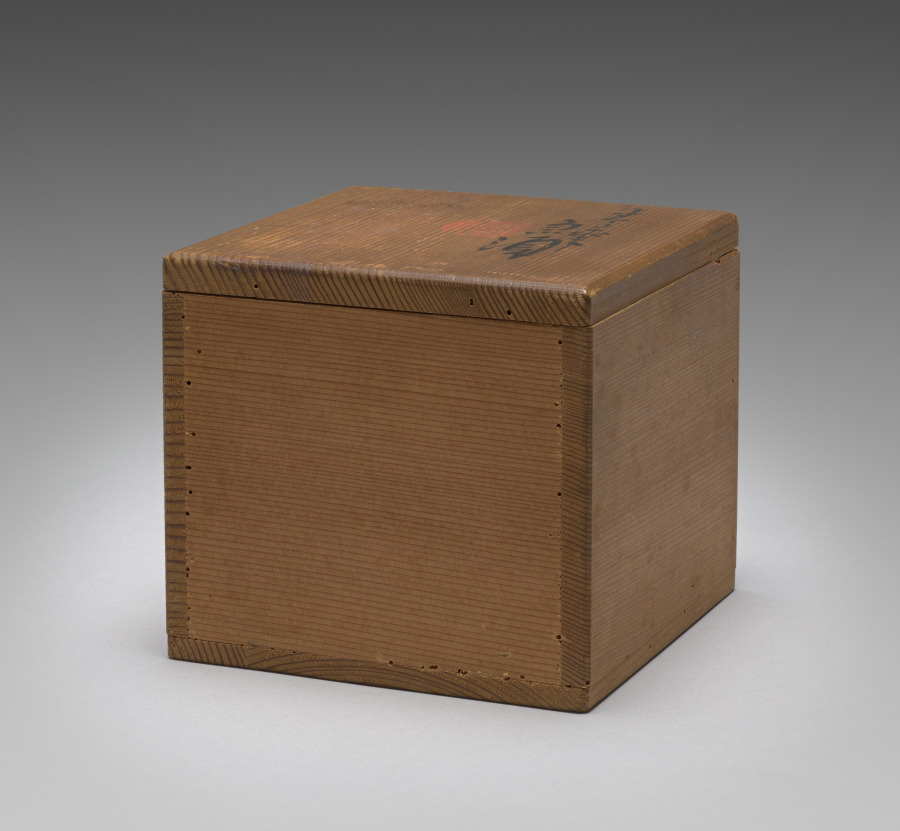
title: Tea Set with Orchids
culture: Japan, Meiji period (1868–1912)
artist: Seifū Yohei III (Japanese, 1851–1914)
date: c. 1893–1914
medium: Teapot with set of five teacups; porcelain with underglaze blue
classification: Ceramic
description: Although the teapot here is stored in a separate box from the five cups, these six pieces may once have been part of a tea set that included other tools such as a water cooler. The teacups have orchid flowers on both sides in underglaze blue, as well as a blue band inside the footring. The teapot has the same design and a blue band painted around the bottom of the lid’s knob. The cups’ long wood storage box is stamped on the exterior, over the lid and base, with a small red seal reading “Satō.” The same seal appears on five small squares of yellow textile, one placed in the bottom of each compartment in the teacup storage box. These are additional to the customary yellow cloths stamped with a “Seifu” seal. Interestingly, four of the Seifū cloths are stamped with an ovoid seal, while the remaining cloth, which is a slightly lighter color, has an unusual seal that is not quite gourd-shaped and with the fū of Seifū in a stylized, unrecognizable form. The teapot has its own box with a Satō seal and is wrapped with an orange textile stamped with the same unusual Seifū seal. A set with a very similar surface design is in the Brooklyn Museum. The Brooklyn set has a water cooler and a small pitcher, in addition to the teapot and cups, and all are in a single storage box. This box records the tea tools as made with kanpakuji, or “bright-jewel white porcelain,” counted among Yohei III’s most important inventions, and carved images. In fact, both sets have a white surface much closer in coloration to the cool white of porcelain clay used in Kyoto at the time, and the designs are simply painted. The Brooklyn set was thus likely mismatched at some point with a box intended for another tea set. Nonetheless, the box may have helped prevent the set’s original components from being dispersed, and the set itself provides insight into how the other tools from the present set may have looked.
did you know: This tea set with orchids has a side-handled pot called a kyūsu, used for steeping, straining, and serving tea.